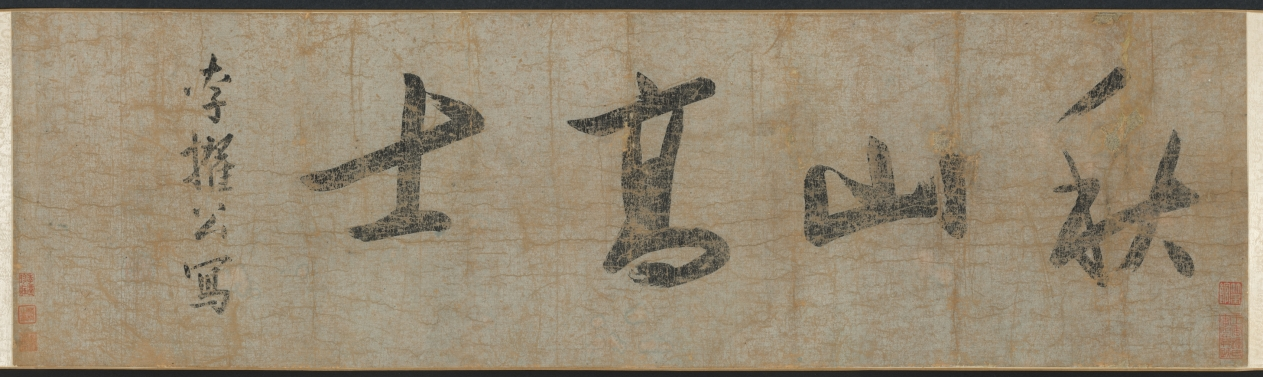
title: Scholar-Hermits in the Autumn Mountains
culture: China, Ming dynasty (1368–1644)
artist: Tang Yin (Chinese, 1470–1523)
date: 1500–1510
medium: handscroll, ink and light color on silk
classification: Painting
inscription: Artist's signature and 2 seals at end of scroll: Tang Yin [seals] T'ang Po-hu; T'ang Tzu'wei t'u-shu.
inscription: Title on frontispiece by Li Cho-kung (dates unknown).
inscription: 1 colophon and 11 additional seals: 1 colophon dated 1915 of Wu Tso-hsi (19th-20th c.); 2 seals of Gao Qifeng 高奇峰 (1889–1933); 5 seals of C. C. Wang 王季遷 (1907–2003); 4 seals unidentified.